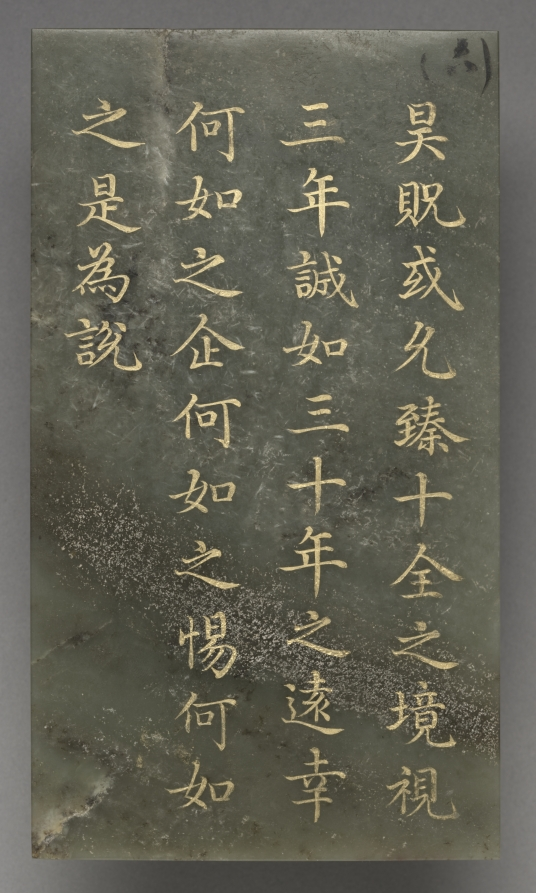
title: Tablet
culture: China, Qing dynasty (1644–1911), Qianlong reign (1736–95)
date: 1778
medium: jade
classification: Jade